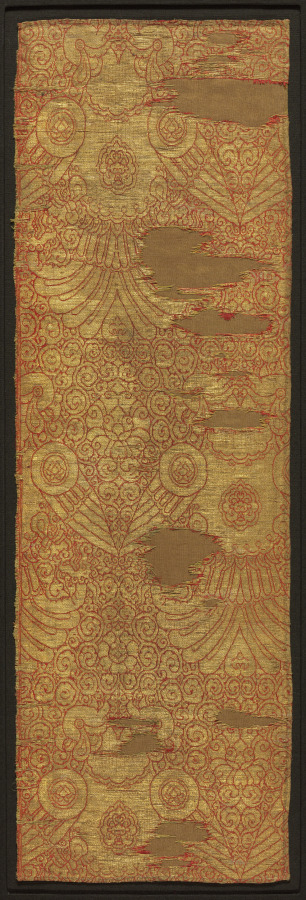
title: Cloth of Gold: Displayed Falcons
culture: Central Asia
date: mid-1200s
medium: Silk and gold thread, lampas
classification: Textile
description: Mongol ceremonial robes, known as zhisun, were made from textiles woven with gold and silk of one color. These were given by Mongol emperors to members of the court to be worn during festivals and on important occasions that usually included lavish banquets. Like the Winged Lions and Griffins (CMA 1989.50), the design of this silk is a uniquely Central Asian synthesis of eastern Iranian and Chinese elements. Motifs and technical details shared by the two silks, moreover, leave no doubt that they were produced in the same city.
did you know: This silk lampas weave textile with gold thread features double-headed falcons against a background of vine scrolls.